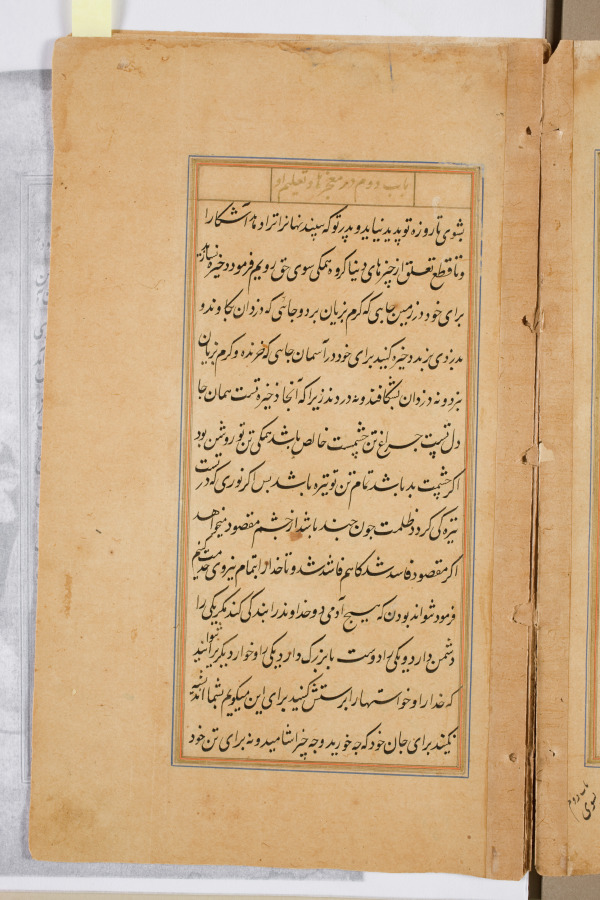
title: Text page from a Mirror of Holiness (Mir’at al-quds) of Father Jerome Xavier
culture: Mughal India, Allahabad, made for Prince Salim (1569–1627)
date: 1602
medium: Ink and gold on paper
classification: Manuscript